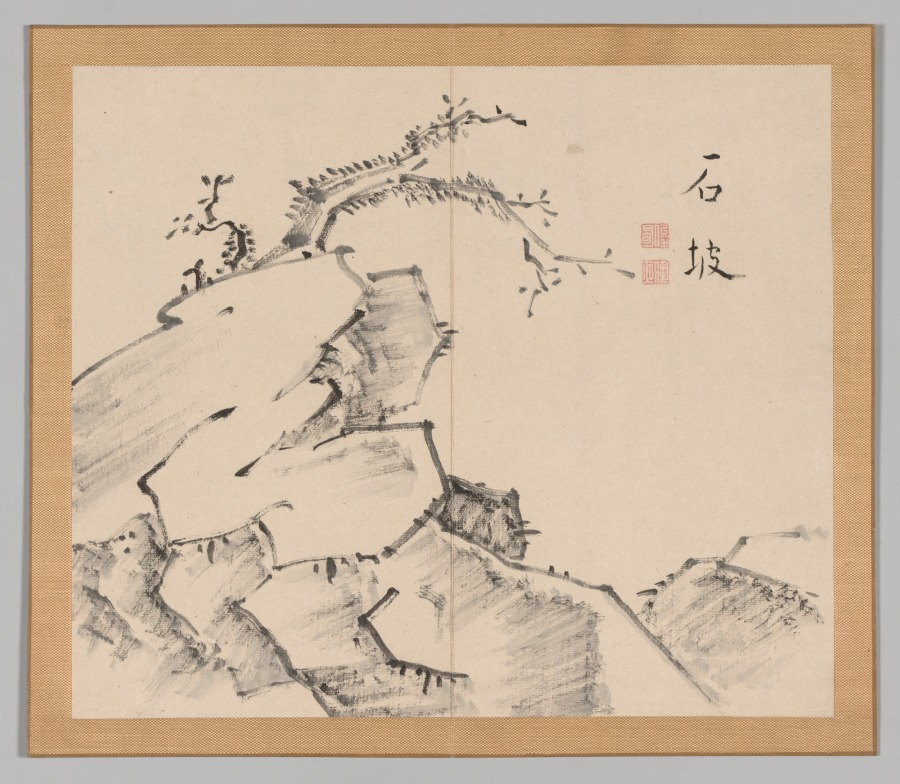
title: Reverberations of Taiga, Volume 1 (leaf 20)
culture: Japan, Edo period (1615–1868)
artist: Aoki Shukuya (Japanese, d. 1802)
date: mid- to late 1700s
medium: double-leaf from a pair of albums; ink and light color on paper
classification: Portfolio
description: Traditionally, young painters in Japan began their studies with an established master-painter. The master's compositions invariably became models that the apprentice copied to learn various ink and brush techniques. Shukuya was a pupil of the famous Kyoto artist Ikeno Taiga, whose style is reflected in these sketches of rocks, trees, and mountains.